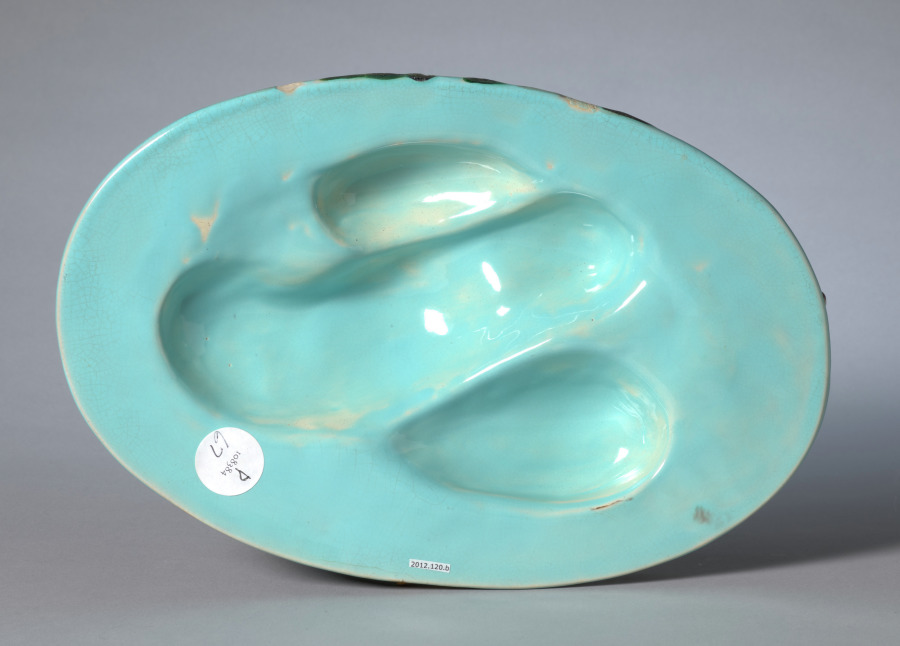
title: Game Pie Dish (Lid)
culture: England, 19th century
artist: Minton Pottery and Porcelain Factory (British)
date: c. 1860–80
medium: earthenware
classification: Ceramic